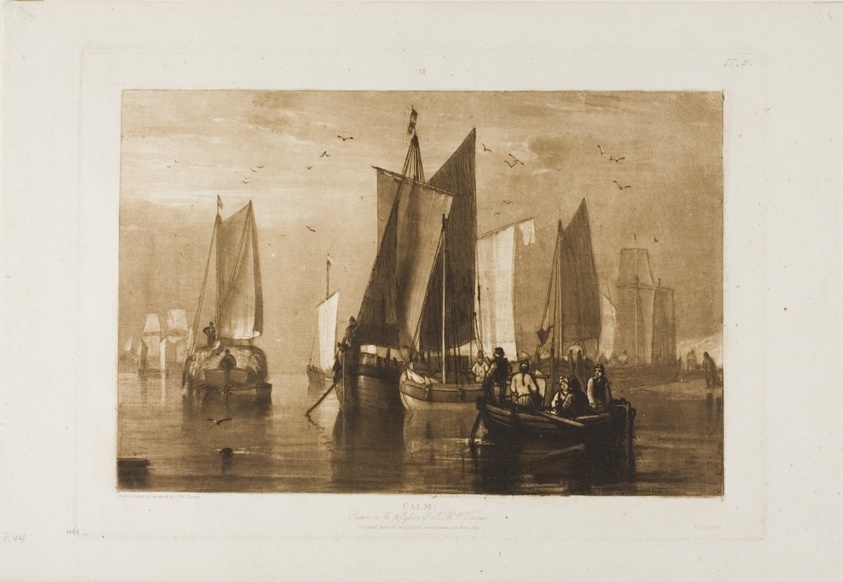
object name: Print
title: Calm, plate 44 from Liber Studiorum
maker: Joseph Mallord William Turner (English, 1775-1851)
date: Published April 23, 1812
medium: Etching and aquatint in brown on ivory wove paper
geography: England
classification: mezzotint; print; prints and drawing